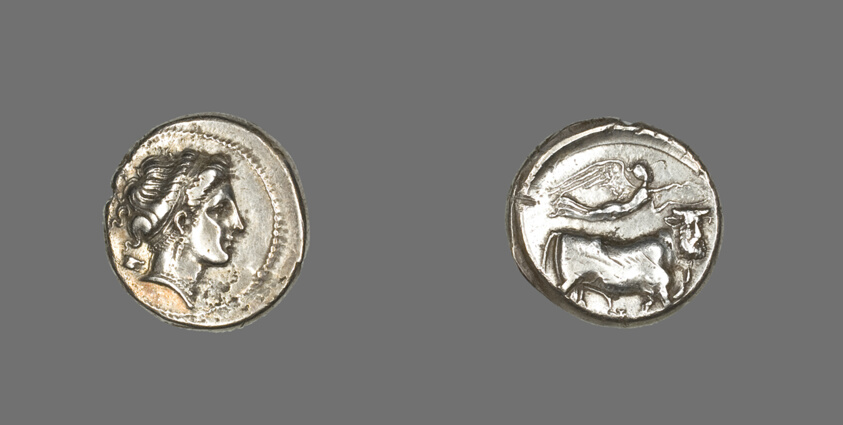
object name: Coin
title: Stater Coin Depicting the Nymph Parthenope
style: greek, ancient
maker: Greek, minted in Neapolis (now Naples), Campania, Italy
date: 325-241 BCE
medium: Silver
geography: Naples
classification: coin; ancient art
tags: mythological figures, bull, goddesses